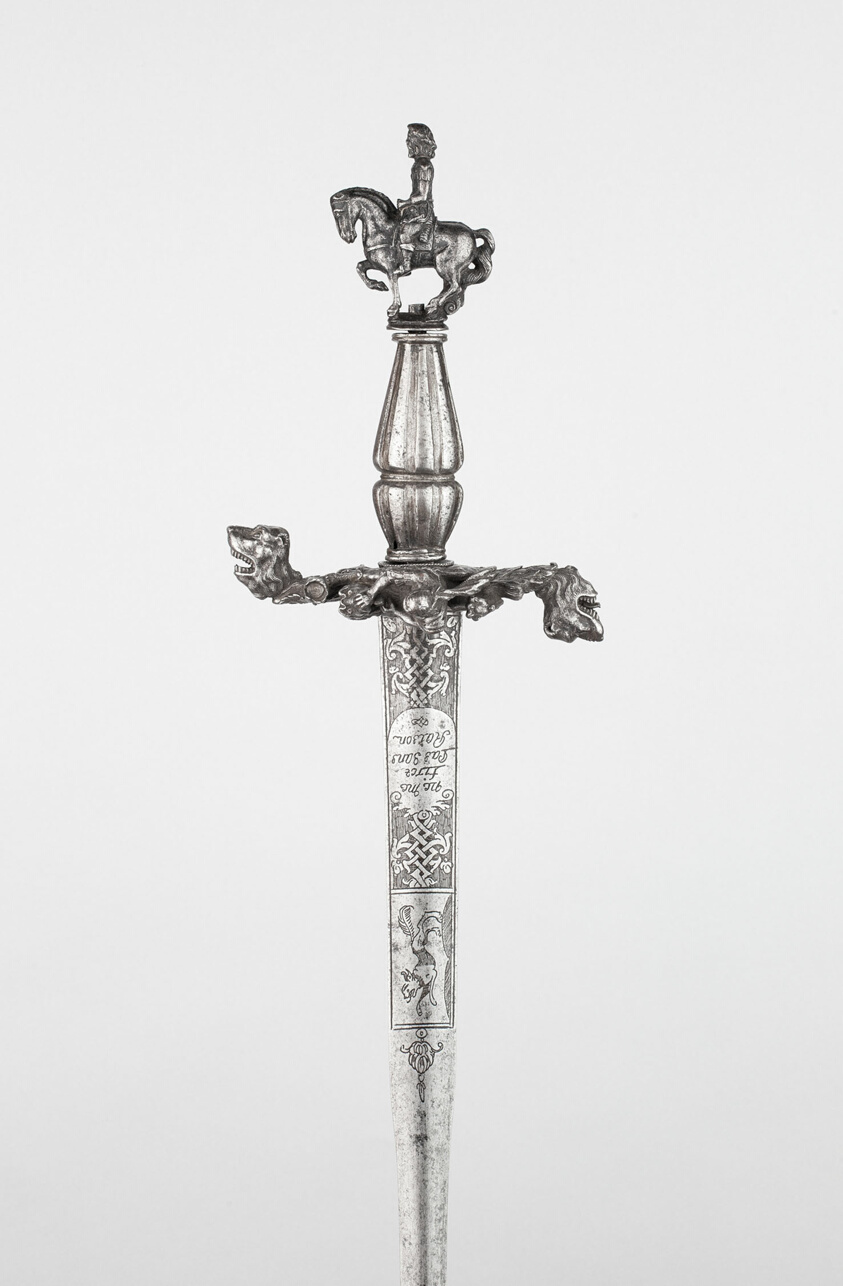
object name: Arms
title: Smallsword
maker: Crossguard and Pommel: attributed to Gottfried Christian Leygebe; German, Nuremberg, 1630-1683; Blade: French, early 18th century; Grip: German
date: Crossguard and Pommel: c. 1650 Blade: early 18th century Grip: c. 1550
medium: Steel with gilding and iron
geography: Nuremberg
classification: edged weapon-sword; arms; arms and armor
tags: dogs, animals